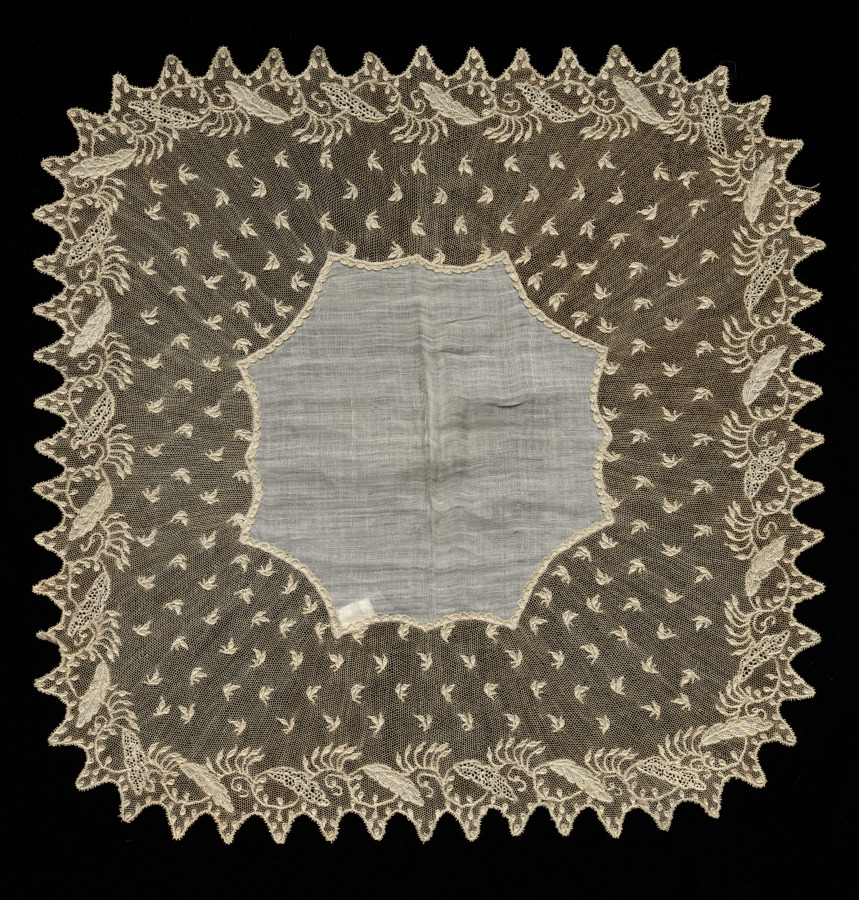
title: Lace Handkerchief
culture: France, Alençon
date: late 1700s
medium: Plain weave linen center with needle lace (Point d'Alençon) border and embroidered edging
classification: Lace